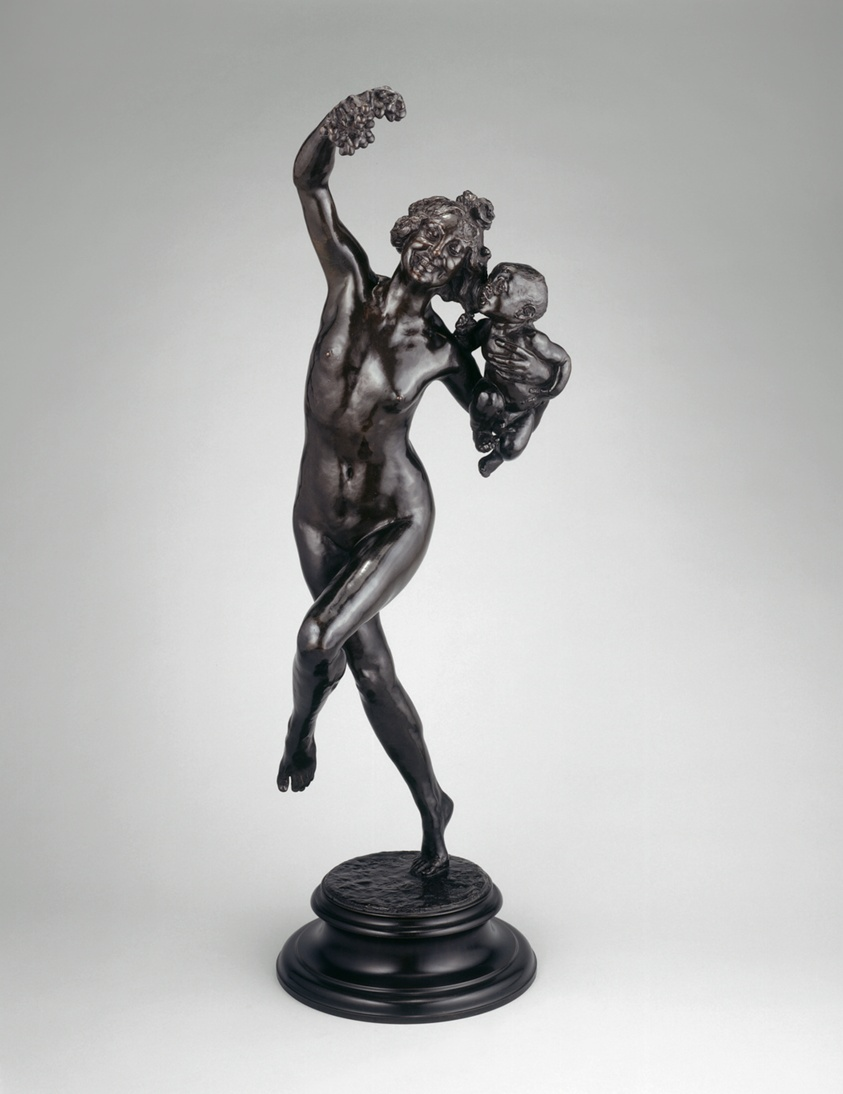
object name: Sculpture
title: Bacchante with Infant Faun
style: Realism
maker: Frederick W. MacMonnies (American, 1863–1937); Cast by Jaboeuf et Rouard; Paris, France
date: Modeled 1894, cast after 1894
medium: Bronze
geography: Paris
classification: sculpture; american arts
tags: dining, drinking, people, portraits